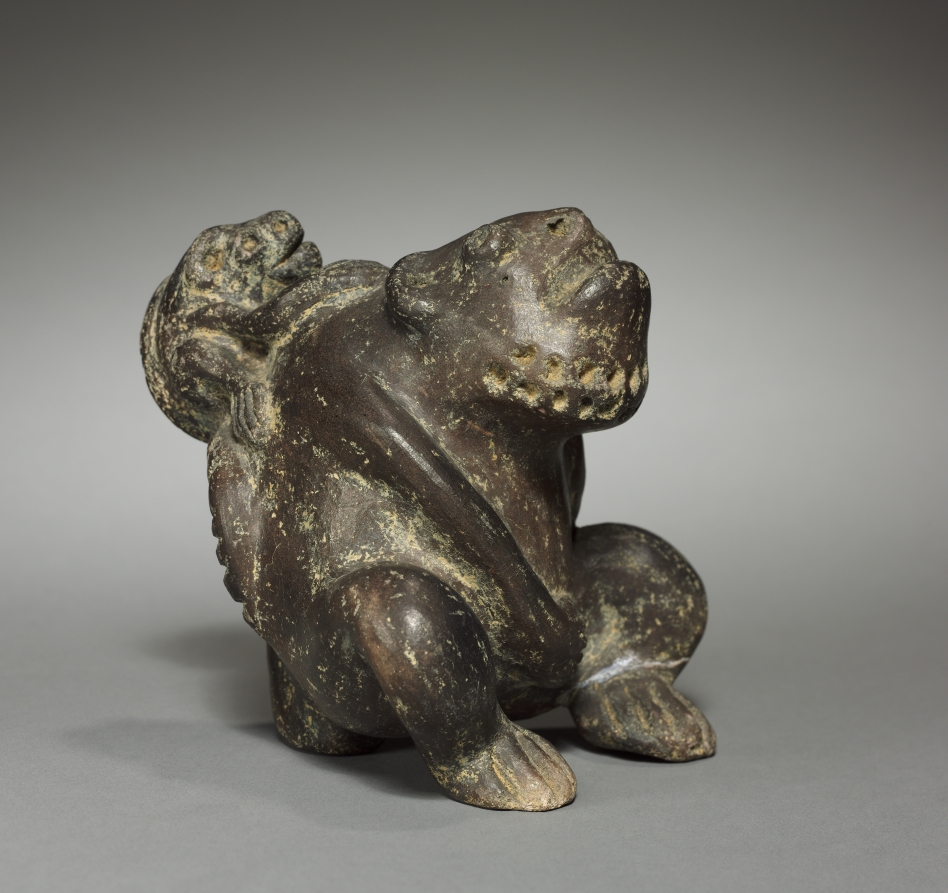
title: Jar in Shape of Grotesque Beasts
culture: Colombia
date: before 1921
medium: pottery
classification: Ceramic